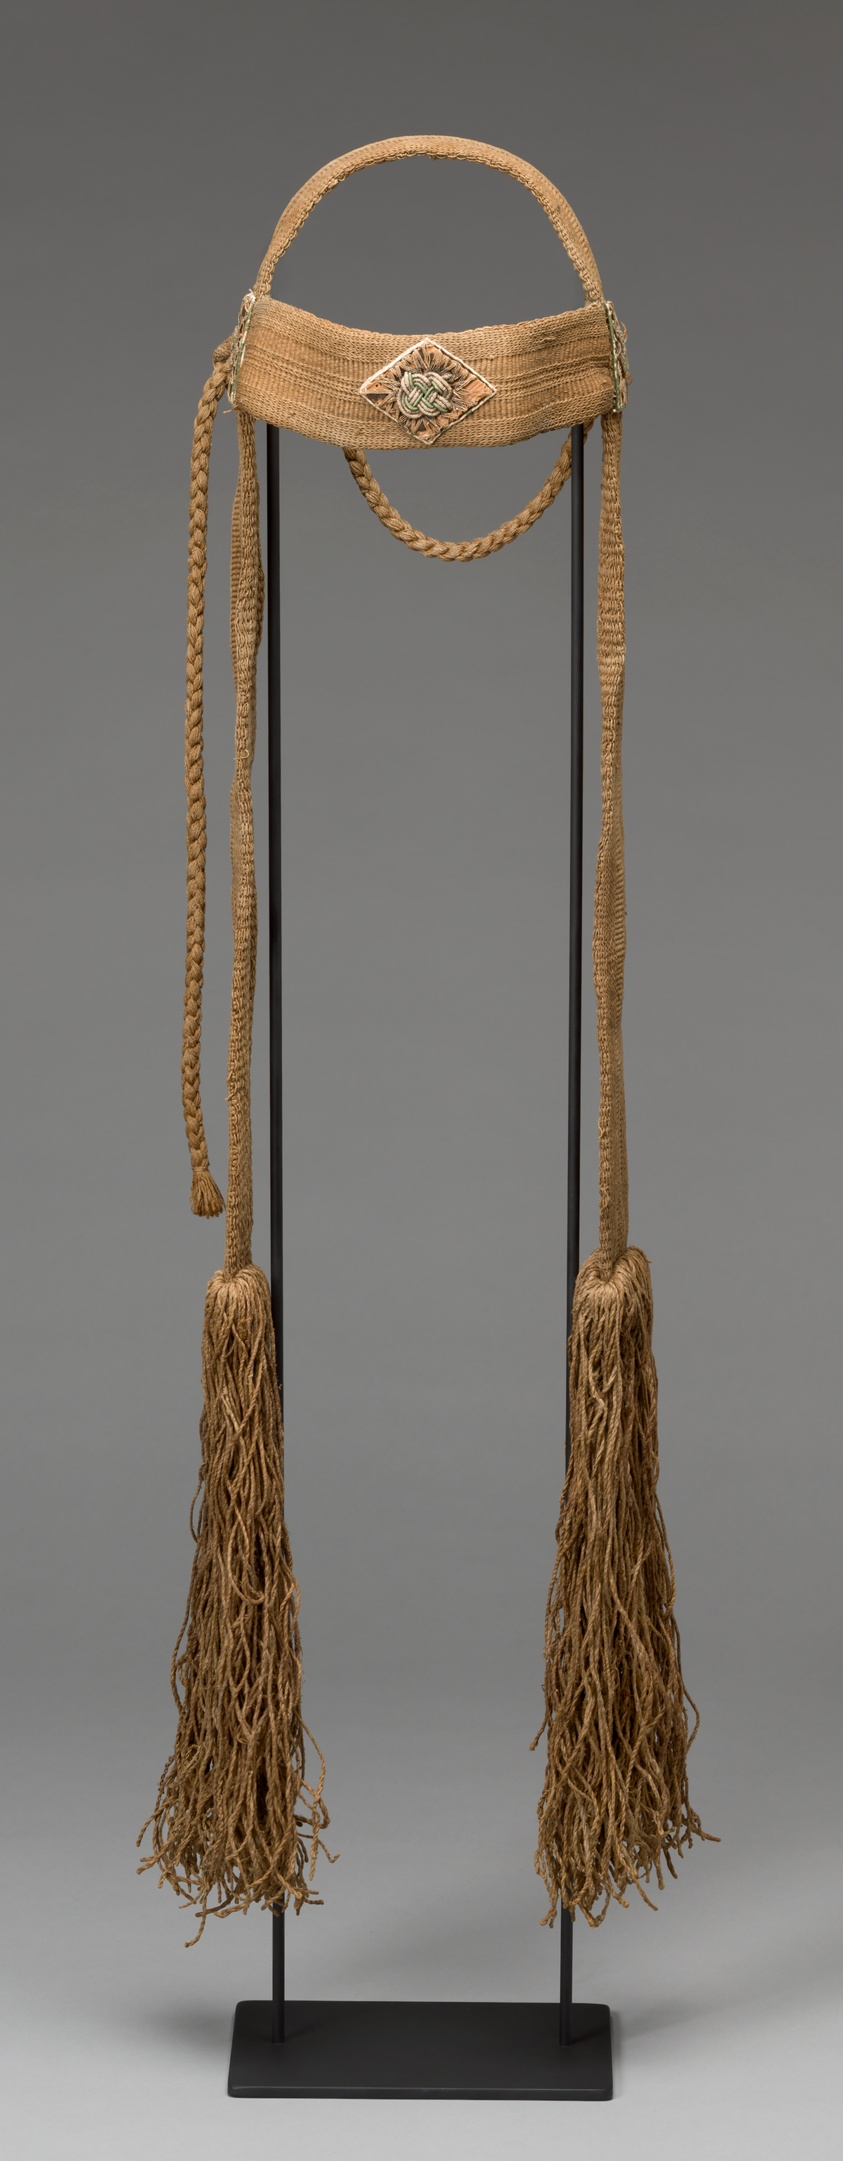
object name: Costume and Accessories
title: Ceremonial Headdress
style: ainu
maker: Ainu (Hokkaidō, Japan)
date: Edo period (1615–1868), first half of the 19th century or earlier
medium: Bast fiber, gilt-paper-wrapped silk, silk, and wood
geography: Hokkaido region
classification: costume accessory - headdress; costume; headdress